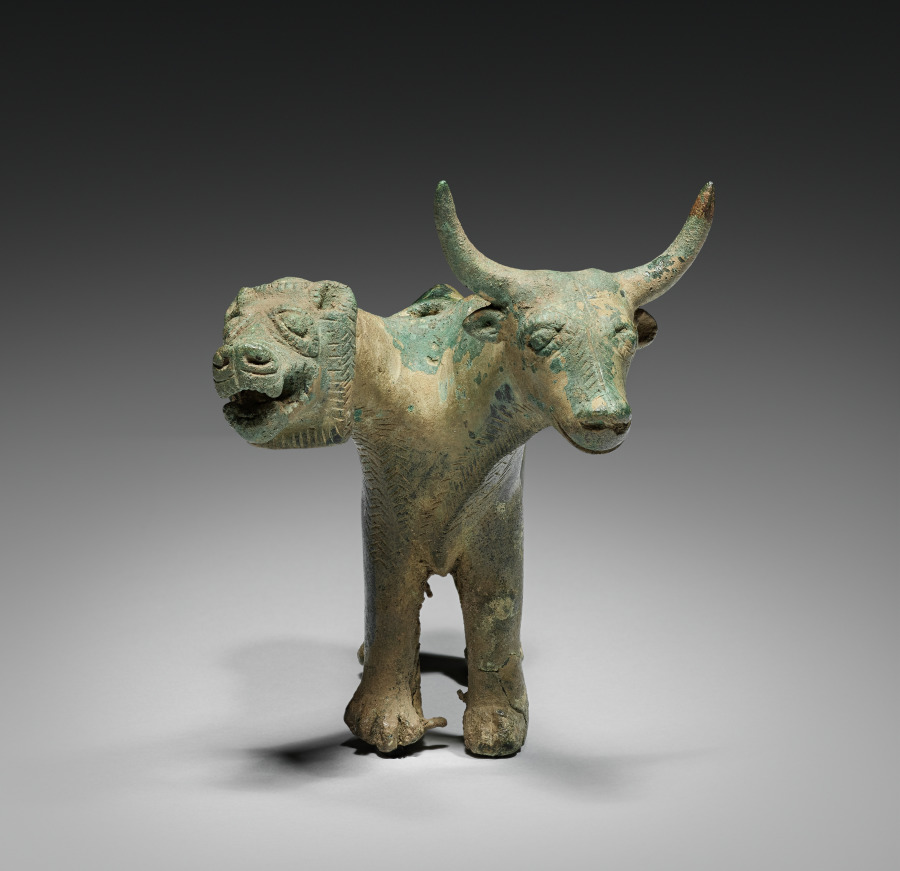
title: Composite Lion and Bull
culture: Iran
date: 1500–1000 BCE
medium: bronze, cast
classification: Sculpture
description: Combining the strength of the lion and the fertility of the bull, this creature must have served as an object of worship in a temple or shrine.